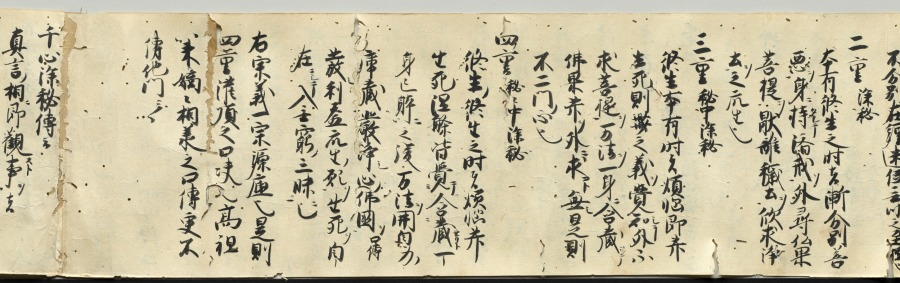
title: Scroll of Miscellaneous Notes written on a Calendar by Priest Seigen (recto)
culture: Japan, Kamakura period (1185–1333)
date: c. 1200–1231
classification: Manuscript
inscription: bears miscellaneous notes written by Priest Seigen.